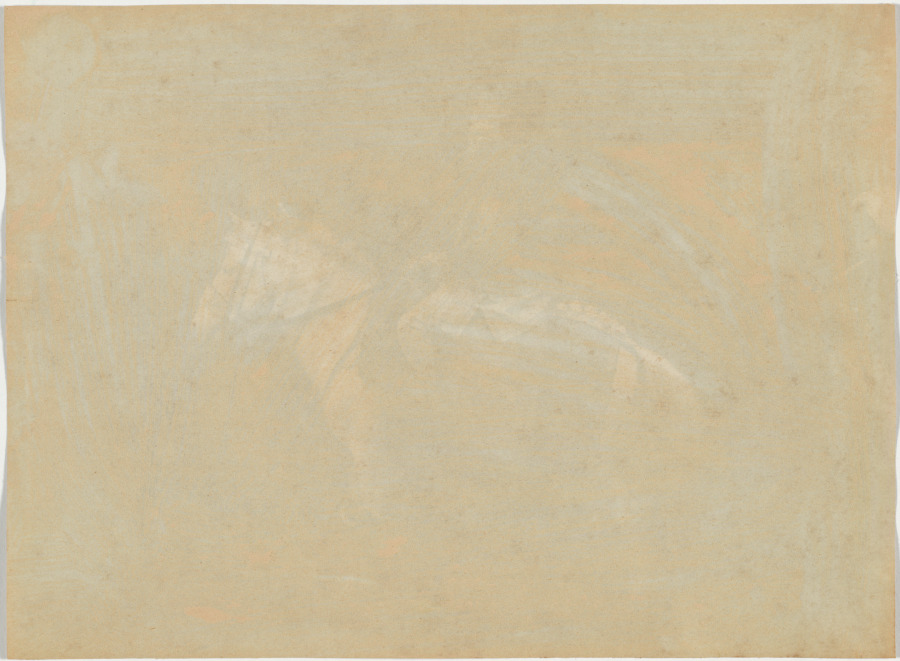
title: His Highness the Maharaja of Rewa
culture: India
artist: Raja Deen Dayal (Indian, 1844–1905)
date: 1886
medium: albumen print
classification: Photograph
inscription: No visible inscriptions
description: Deen Dayal’s status as an Indian person may have helped him gain access to Indian rulers at the start of his career. The year before he received the patronage of British officials, Deen Dayal photographed ten-year-old Venkat Raman Singh (1876–1918; reigned 1880–1918), the Maharaja of Rewa. The studio portrait reveals the boy beneath the crown. He straddles a Western-style chair that is too tall for him, curling under his stockinged feet so they touch the floor. One of his many necklaces holds a painted or photographic portrait similar to the portrait jewel pendant in the nearby case.